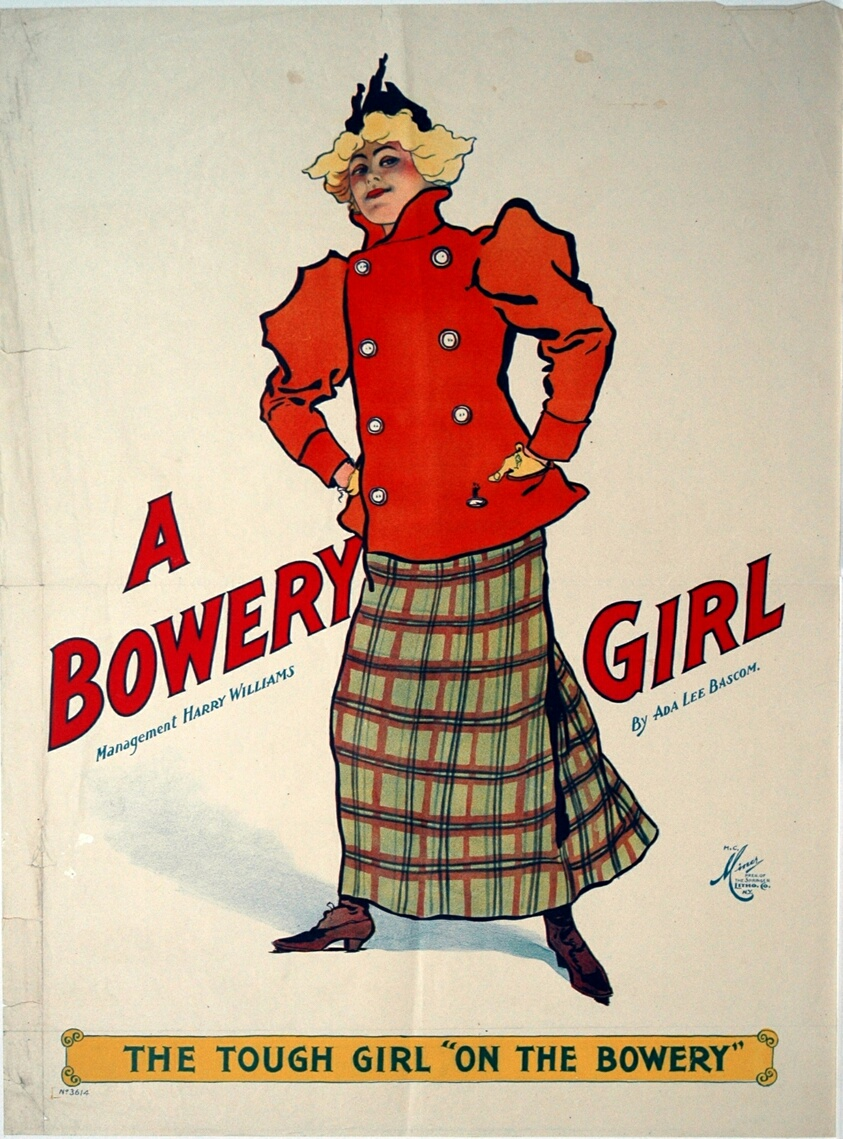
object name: Print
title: A Bowery Girl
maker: Unknown Artist; printed by H.C. Miner, president of Springer Litho. Co.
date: c. 1895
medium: Color lithograph on cream wove paper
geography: United States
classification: lithograph; print; prints and drawing